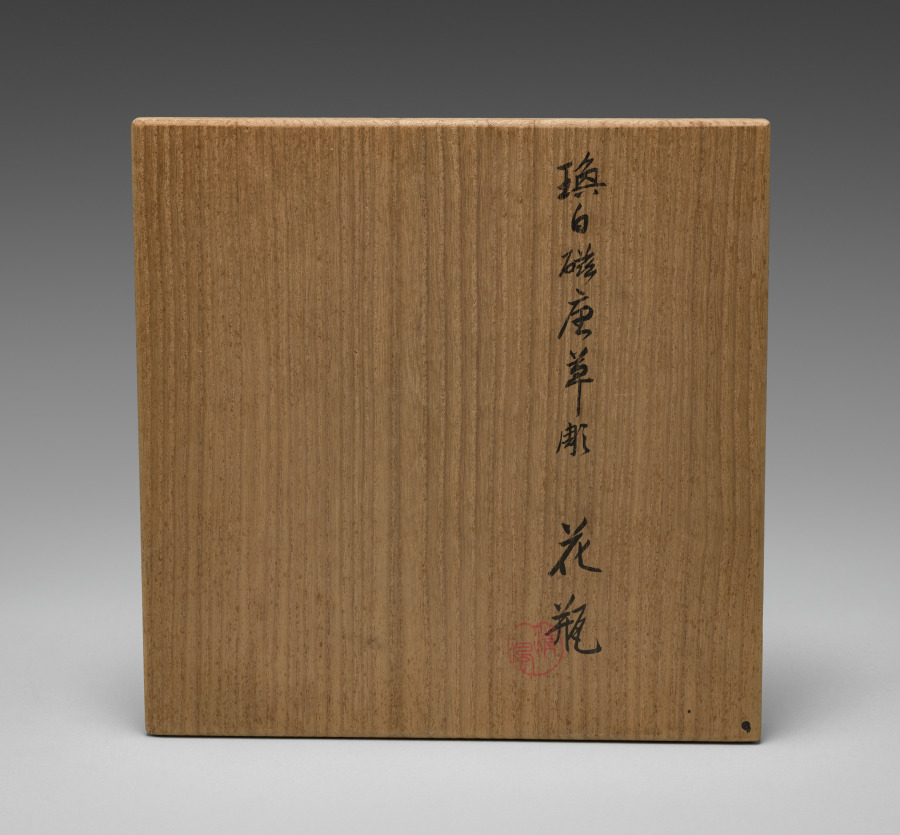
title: Guan-Shaped Vessel with Floral Scroll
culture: Japan, Taishō period (1912–26) or Shōwa period (1926–89)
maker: Seifū Yohei IV (Japanese, 1872–1951)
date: 1914–46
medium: Porcelain with molded and carved design and cream glaze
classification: Ceramic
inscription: 清風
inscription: 清風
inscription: 清風造之 【印】成山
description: Many of the vases created by Yohei III and IV were made with reference to and in emulation of Chinese ceramics in both form and glazing. The Seifu studio was inspired by later Chinese copies of two other archaic vessel types, the hu (Japanese ko) and guan (Japanese kan). In simple terms, in their original contexts, the hu and guan were storage jars that also appeared in ritual contexts. This hefty guan-shaped vase by Yohei IV has a floral scrolling pattern known in Japanese as karakusa, or “Chinese grasses.” The flowers are generally identified as lotus or peony. This flower vase might alternately be categorized as having the form of what is called a shukaiko in Japan, or a large vessel for holding wine. Shukaiko were created as early as the latter part of the Kamakura period after Yuan dynasty examples.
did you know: According to the box lid, the vase is a kanpakuji, "bright-jewel white porcelain," work.